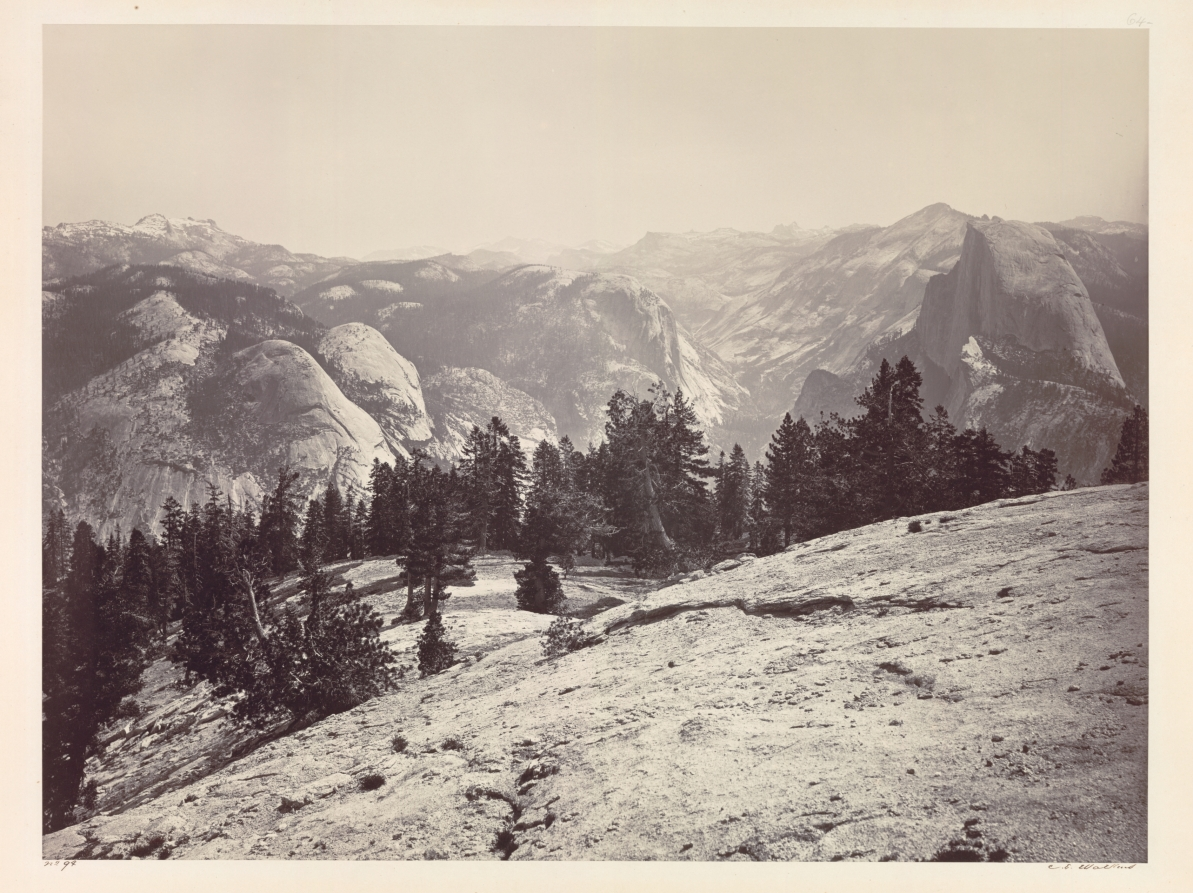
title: The Domes, from the Sentinel Domes, Yosemite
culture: America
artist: Carleton E. Watkins (American, 1829–1916)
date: c. 1865–1866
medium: mammoth albumen print from wet collodion negative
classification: Photograph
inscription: written in brown ink on recto: "No. 94"; "C.E. Watkins"; Sentinel Dome-Yosemite-No 94 3 (in red crayon)" in pencil at top of mount: "64-" Bottom of mount: "CEW. 182 .X The Domes. From the Sentinel Dome- Yosemite- No 94 3 (3 written in red conte crayon)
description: Although prolific in all types of commercial photography, Carleton Watkins was best known for his majestic images of Yosemite Valley. He first transported his mammoth-plate camera there in 1861 and returned many times to record America's natural treasure. Besides establishing aesthetic and technical standards of excellence for landscape photography, Watkins's work was instrumental in passing the 1864 Congressional bill enacted to protect Yosemite from development. In this panoramic view, he displayed elegantly curved rock formations in the foreground. The photograph was structured in overlapping planes, which effectively depicted the seemingly limitless gradations and undulations in the landscape. His skillful suggestion of atmospheric perspective made the mountains and trees appear less clearly visible in the background, enhancing the sense of a vast, pristine landscape.